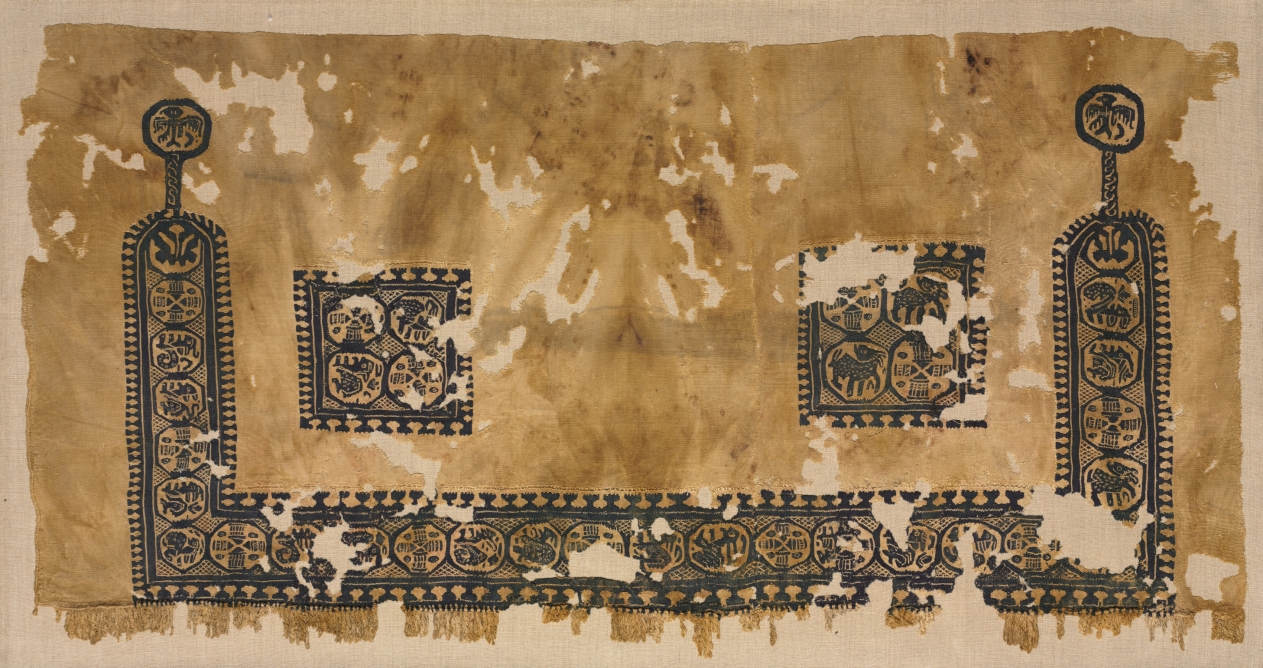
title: Lower Section of a Tunic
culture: Egypt, Byzantine period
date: 400s CE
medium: Undyed linen and dyed wool: tapestry weave with supplementary weft wrapping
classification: Textile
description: This is the bottom section of a well-woven wool unisex tunic. Various stylized roundels with animals and baskets decorate the hem that extends into round finials with birds. The interior two square panels complete the design. Extra wefts, or horizontal threads, enrich the animals and the deep blue ground, probably a failed purple dye. While the robe itself is created from linen, the fringes at the bottom are made from wool.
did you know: Long wide tunics were the most common garments of this time period.